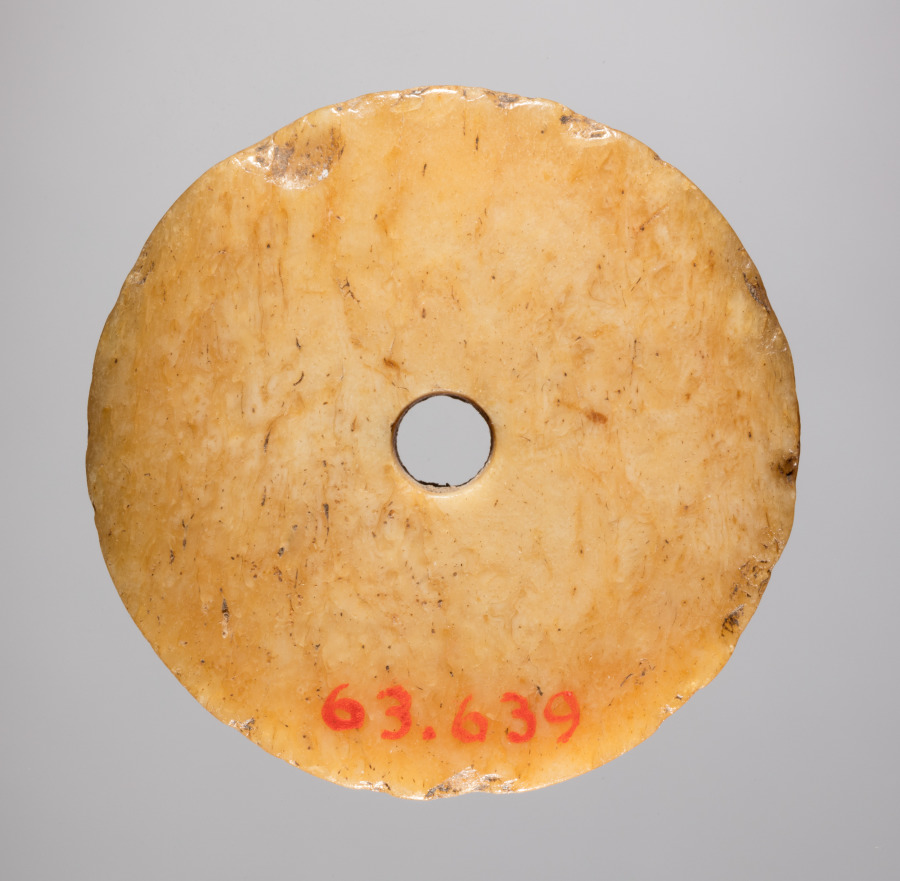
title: Spindle Whorl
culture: Iran, early Islamic period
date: 700s - 900s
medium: bone, incised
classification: Spindle Whorl